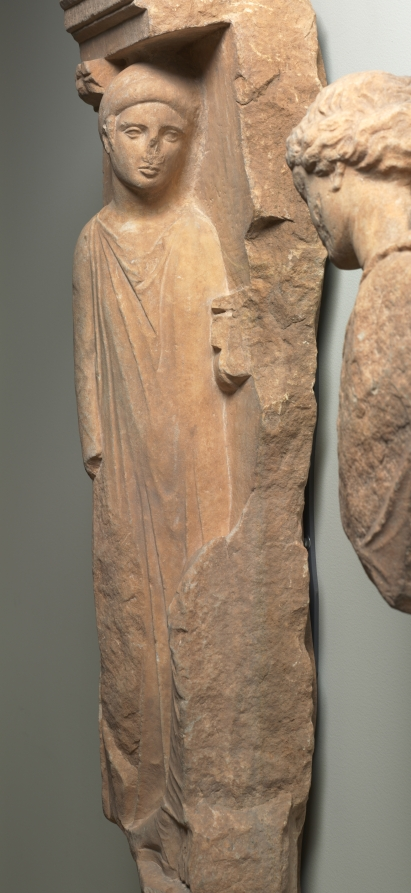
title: Grave Stele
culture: Greece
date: 400–350 BCE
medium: pentelic marble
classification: Sculpture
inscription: ...ΜΕΓΑΛΗΝ ΛΥΠΗΝ ΣΥ ΛΙΠΟΣΑ ΦΑΝ... ...ΔΕ ΣΕΠΩΙΚΤΙΣΕ ΜΟΙΡΑ ΠΟΘΕΙ...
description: Carved in high relief, the original composition of this Attic grave marker can be reconstructed by comparison with more complete examples elsewhere (such as the Stele of Hegeso in Athens [National Archaeological Museum, 3624]). The standing figure at left likely represents a maid or servant, her hair mostly contained within a sakkos (haircloth). Holding a pyxis (small container) in her left hand, she approaches the more fragmentary seated figure at right. This woman, draped and casting her eyes downward, represents the deceased, perhaps Phanostrate, as one scholar has restored the partial name Phan... inscribed in the fragmentary epigram on the preserved portion of the lintel.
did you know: The fragmentary seated woman at right represents the deceased.